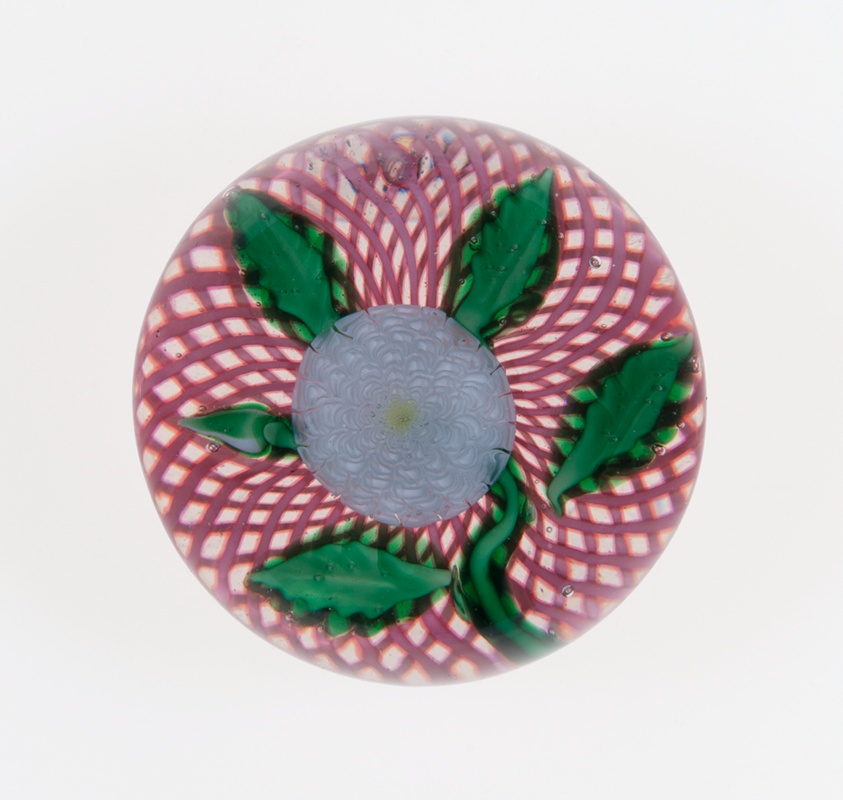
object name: Glass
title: Paperweight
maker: Saint-Louis Glassworks (Cristalleries de Saint-Louis); Lorraine, France, founded 1586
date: c. 1845–60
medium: Glass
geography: Saint-Louis-lès-Bitche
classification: paperweight; glass